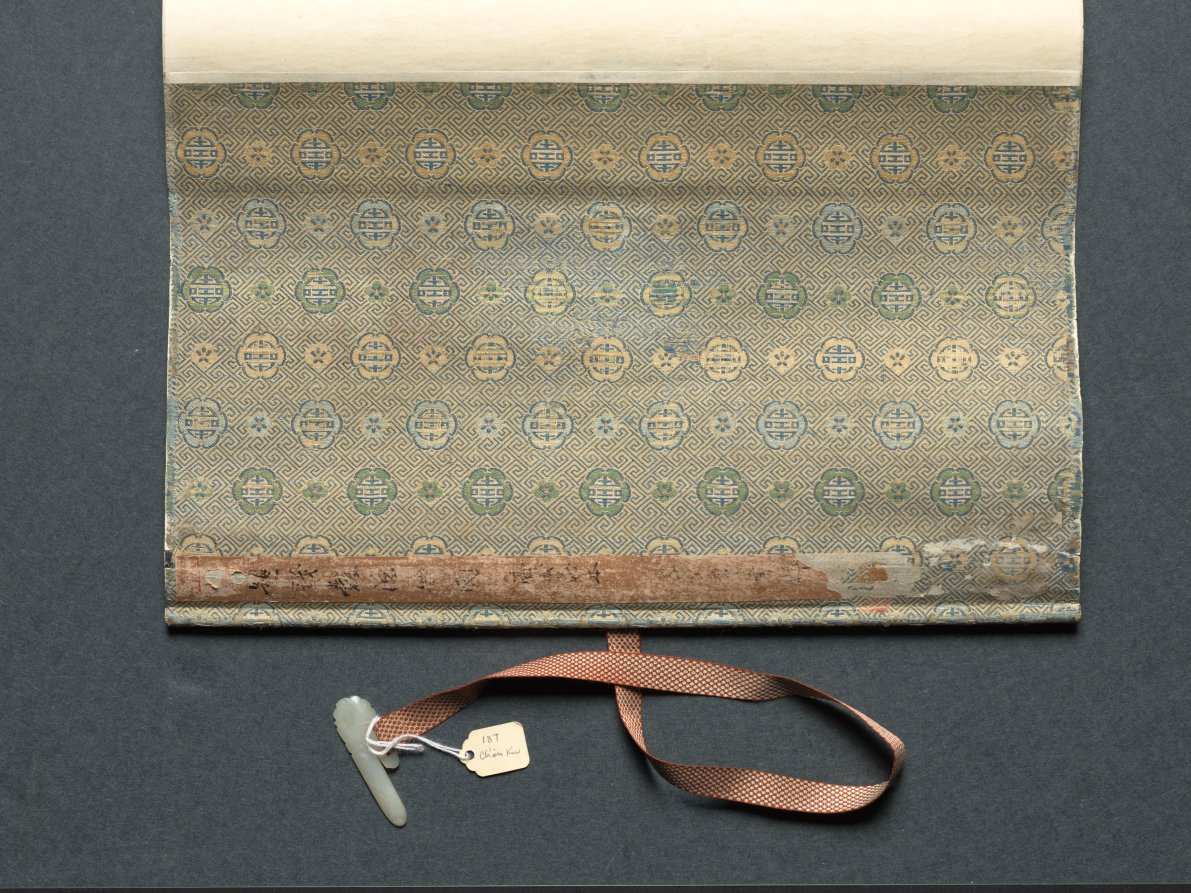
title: Fisherman's Joy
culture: China, Ming dynasty (1368–1644)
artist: Qian Gu (Chinese, 1508–c. 1578)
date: 1572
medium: Handscroll; ink and light color on paper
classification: Painting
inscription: Artist's inscription, signature, and seal: On the autumn day of the jen-shen year [1572], P'eng-ch'eng, Ch'ien Ku painted [this]. [seal] Hsüan-ch'ing shih. 2 colophons, both dated 1689, and 5 additional seals of Yün Shou-p'ing (1633-1690).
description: This painting has a scene showing two small crafts, each manned by two fishermen, practicing a traditional fishing method. In one of them, a man uses a bamboo pole to direct the movements of a cormorant bird sent into the water. Cormorant fishing, witnessed in some areas of the lower Yangzi River, appears in Zhe school paintings. Qian Gu may have borrowed these narrative figure scenes from Zhe school paintings, while his vantage point, brushwork, and soft tones align with the Wu school style. Scenes of fishermen appealed to urban and educated audiences who idealized the self-sufficient independence of fisherfolk.